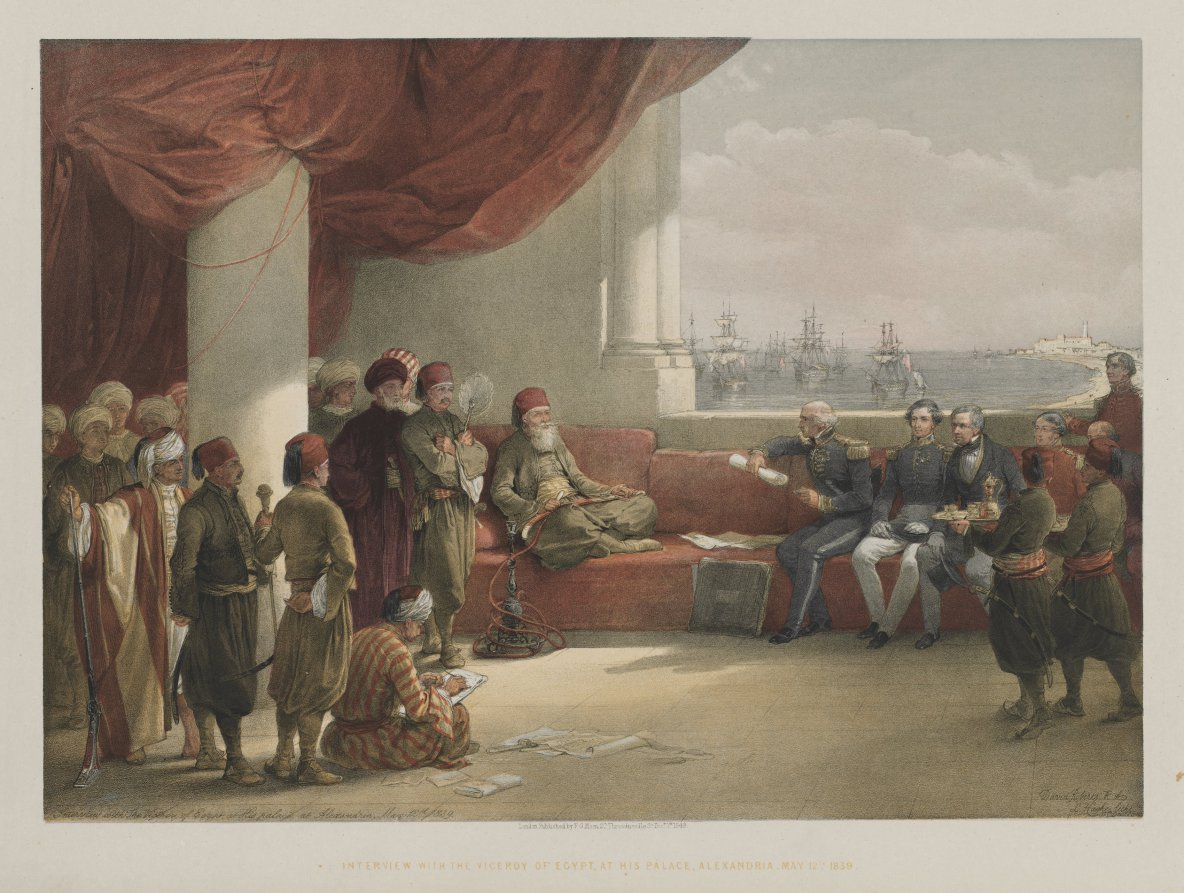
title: Egypt and Nubia, Volume III: Interview with the Viceroy of Egypt, at his Palace, Alexandria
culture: England, 19th century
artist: Louis Haghe (British, 1806–1885)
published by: F. G. Moon, 20 Threadneedle Street, London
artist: after David Roberts (Scottish, 1796–1864)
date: 1848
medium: color lithograph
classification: Print